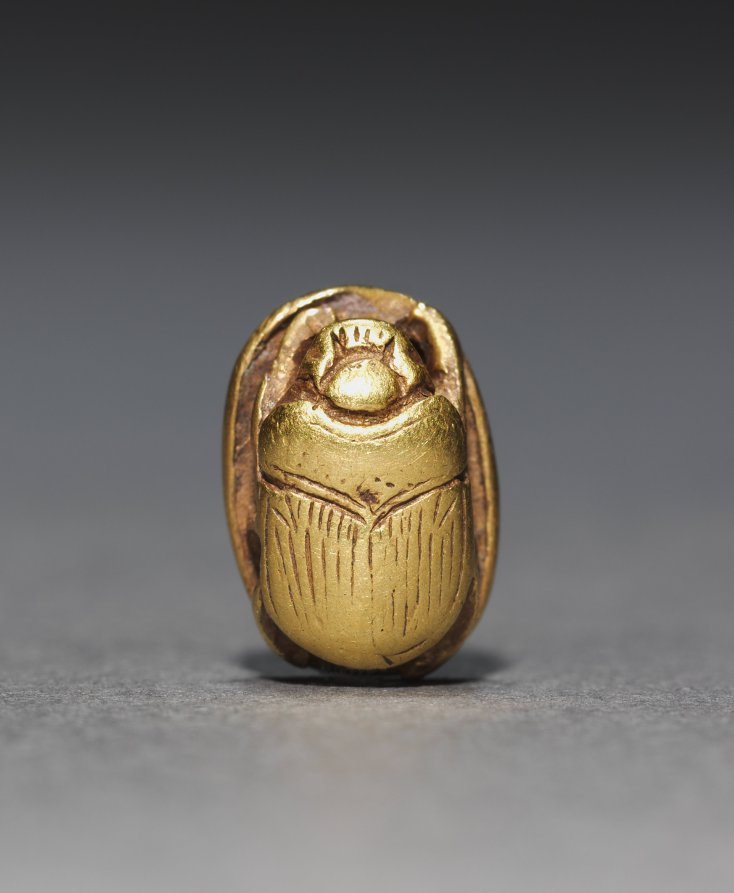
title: Scarab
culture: Egypt, Middle Kingdom (2040–1648 BCE), Dynasty 12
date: 1980–1801 BCE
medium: gold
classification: Scarabs